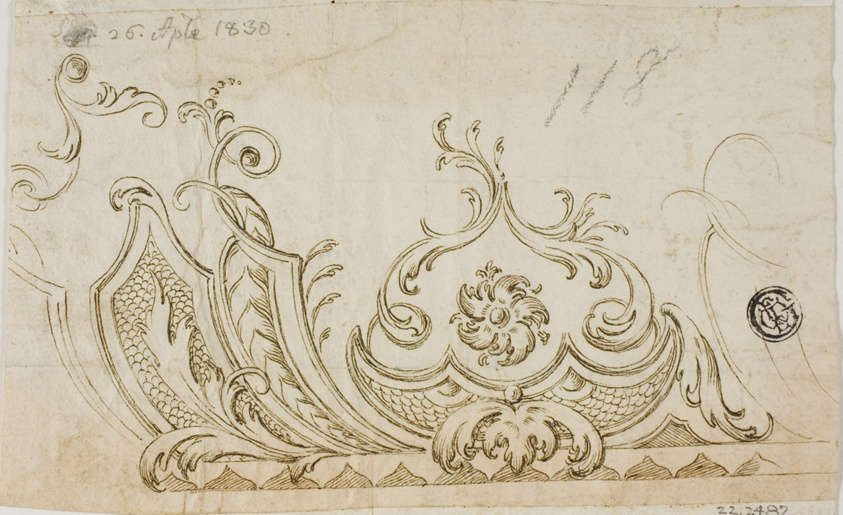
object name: Drawing and Watercolor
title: Decorative Design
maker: Possibly Lodovico Carracci; Italian, 1555-1619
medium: Pen and brown ink, on ivory laid paper, laid down on ivory laid paper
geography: Italy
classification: pen and ink drawings; drawings (visual works); prints and drawing